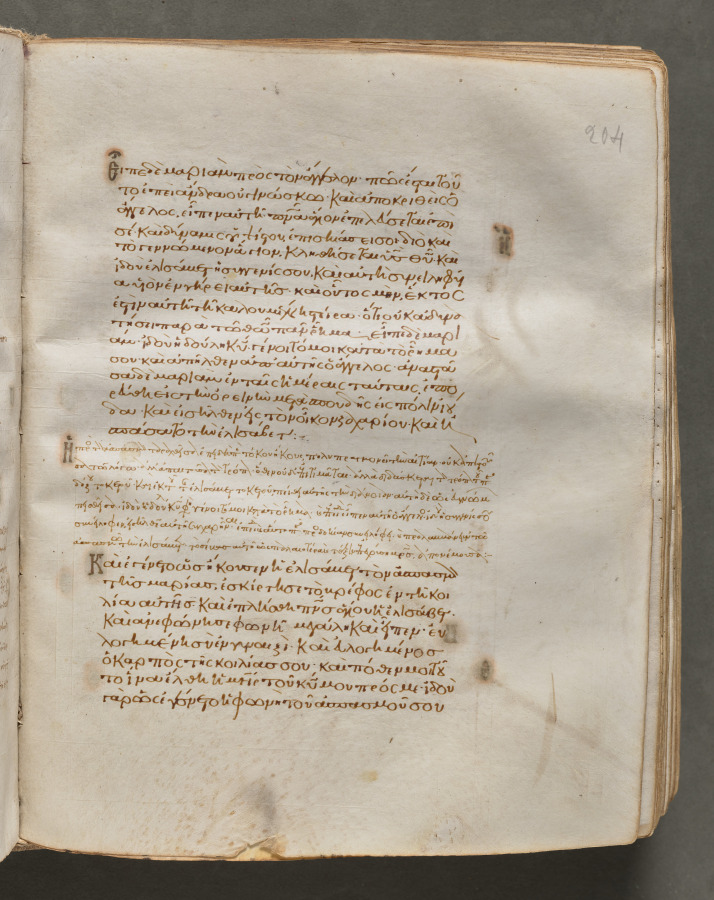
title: Text, folio 204 (recto), from a Gospel Book with Commentaries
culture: Byzantium, Constantinople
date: c. 1000–1100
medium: ink, tempera, and gold on vellum; leather binding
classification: Bound Volume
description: Each of the four gospels in this book opens on a page with brilliantly illuminated borders depicting the author of the text as well as birds-principally peacocks, symbols of the immortality of the soul-and fountains, representing the fountain of life and the salvation of the soul. This volume consists of 428 leaves with texts in Greek. Its level of sophistication suggests that it was probably written and decorated in a monastery in Constantinople.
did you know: Gospel Books were carried in procession through Byzantine churches.